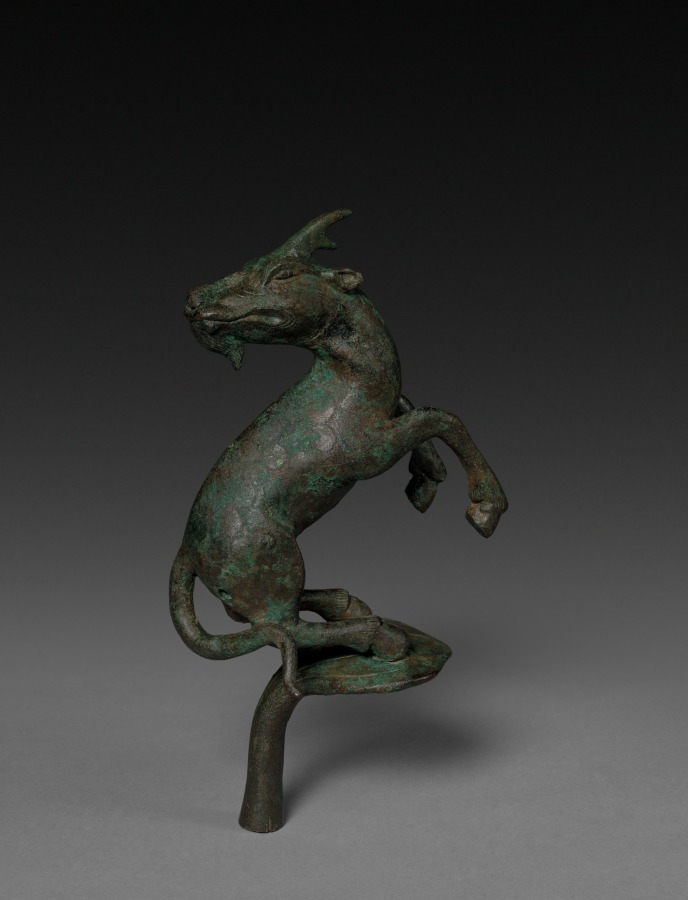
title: Mythical Animal: Tianlu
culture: China, Northern Song dynasty (960-1127)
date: 960–1127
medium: bronze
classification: Sculpture